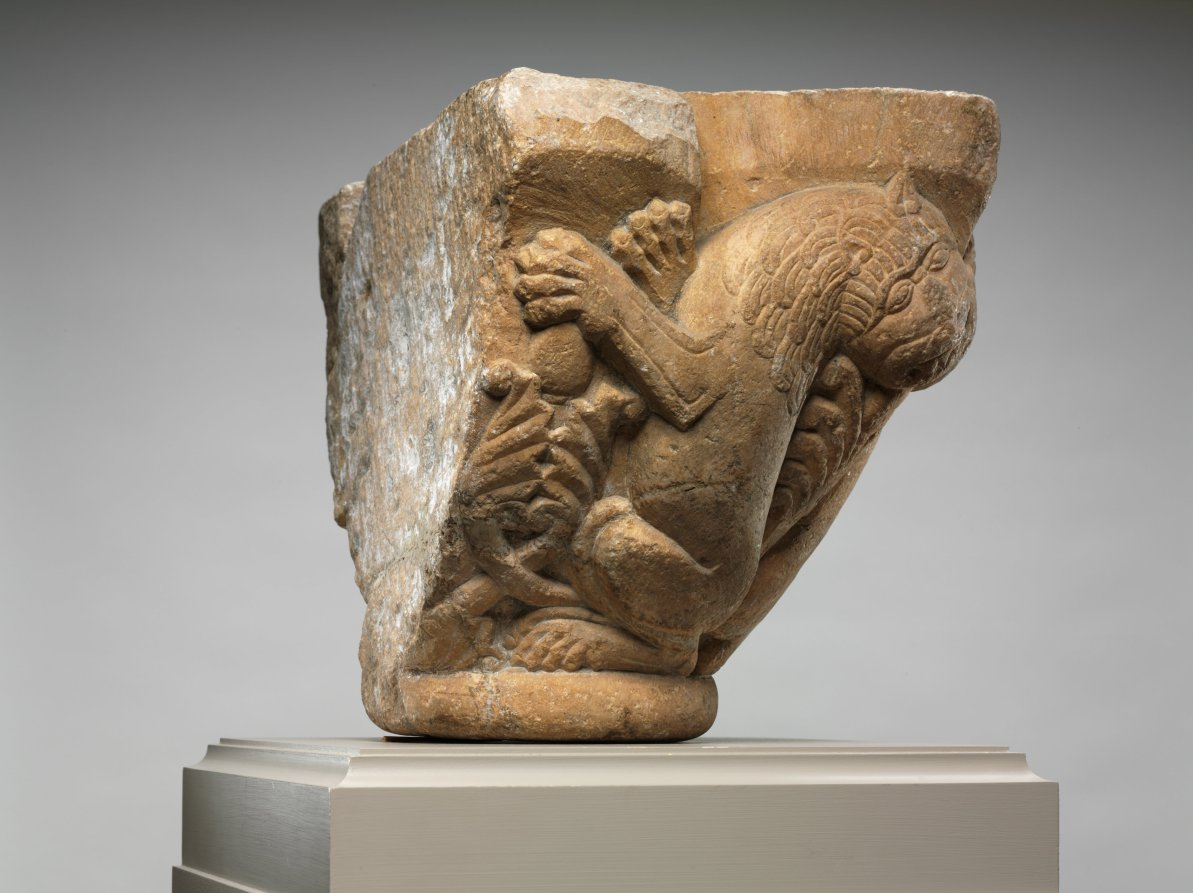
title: Engaged Capital with Lions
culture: Northern Spain (Navarre ?) or Southwest France (Pyrénées or Roussillon ?), mid-12th century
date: 1145–64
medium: marble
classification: Sculpture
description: The compositional motif of confronted and addorsed beasts illustrated on this capital was especially popular in churches along the pilgrimage roads.